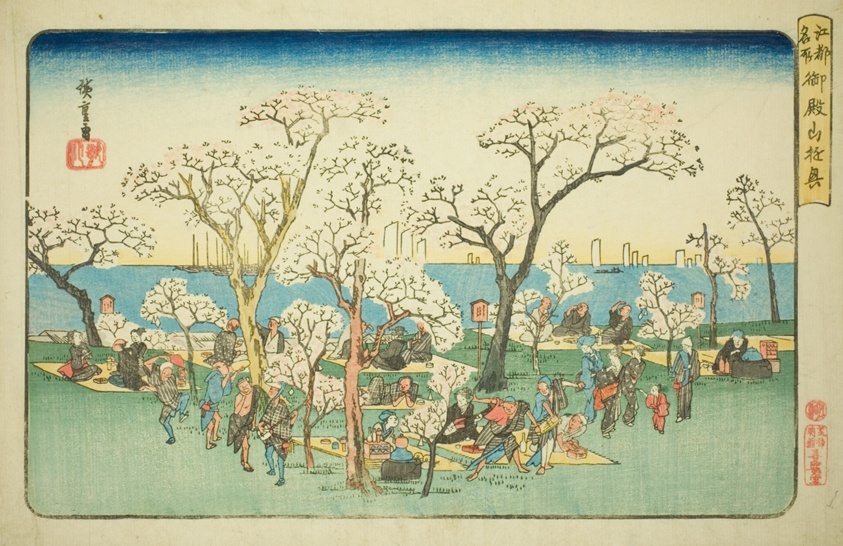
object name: Print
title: Merrymaking at Goten Hill (Gotenyama yukyo), from the series "Famous Places in Edo (Koto meisho)"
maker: Utagawa Hiroshige 歌川 広重; Japanese, 1797-1858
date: c. 1832/34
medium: Color woodblock print; oban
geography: Japan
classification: woodblock print; print; asian art